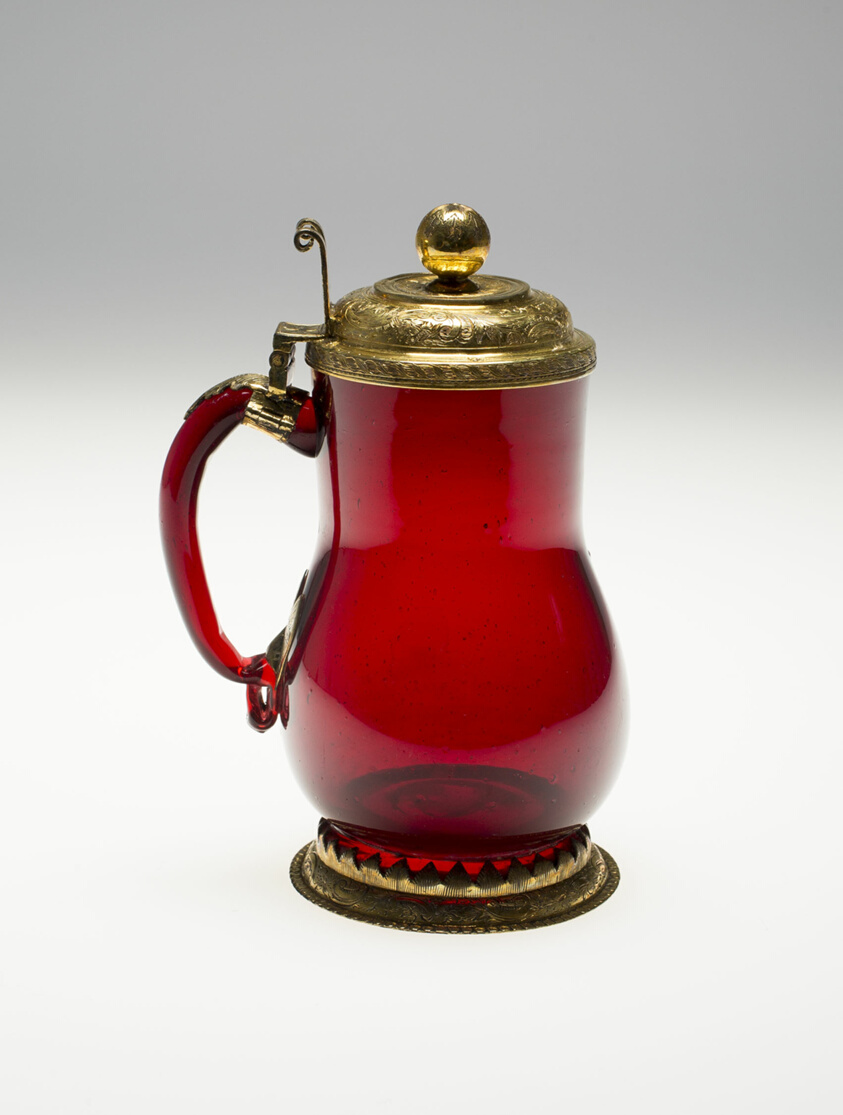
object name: Glass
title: Tankard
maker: Potsdam, Germany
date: c. 1710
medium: Ruby glass with silver-gilt mounts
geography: Southern Germany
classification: drinking vessel; glass; european decorative arts